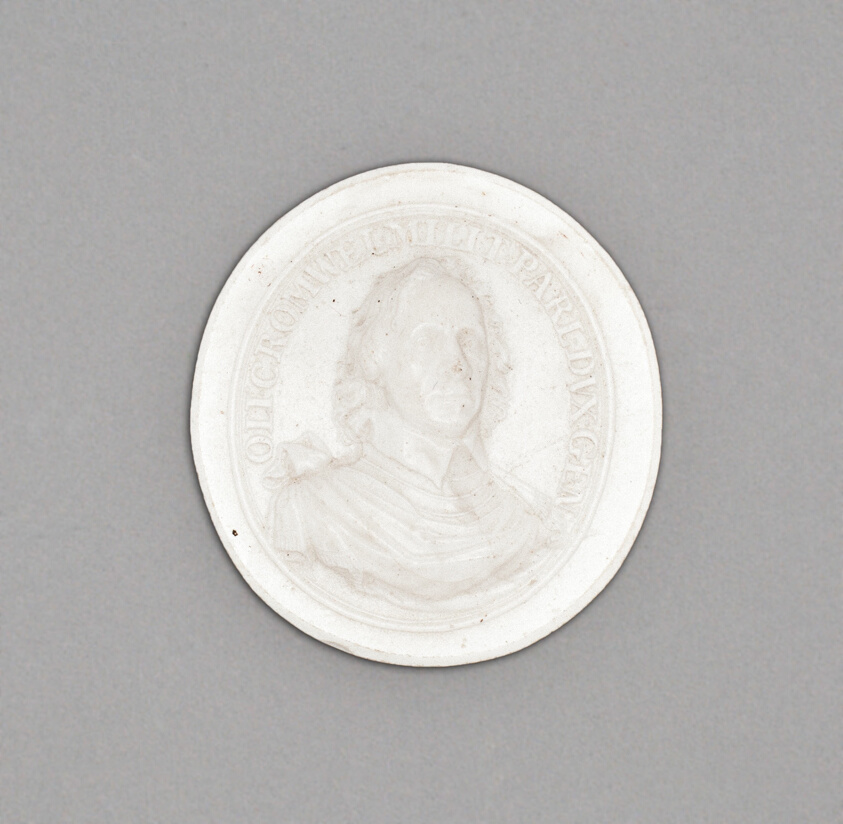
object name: Ceramics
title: Cameo with Portrait of Oliver Cromwell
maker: Wedgwood Manufactory (England, founded 1759)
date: Late 18th century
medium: Stoneware (jasperware)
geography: Burslem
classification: cameo (sculpture); sculpture; stoneware; european decorative arts; ceramics